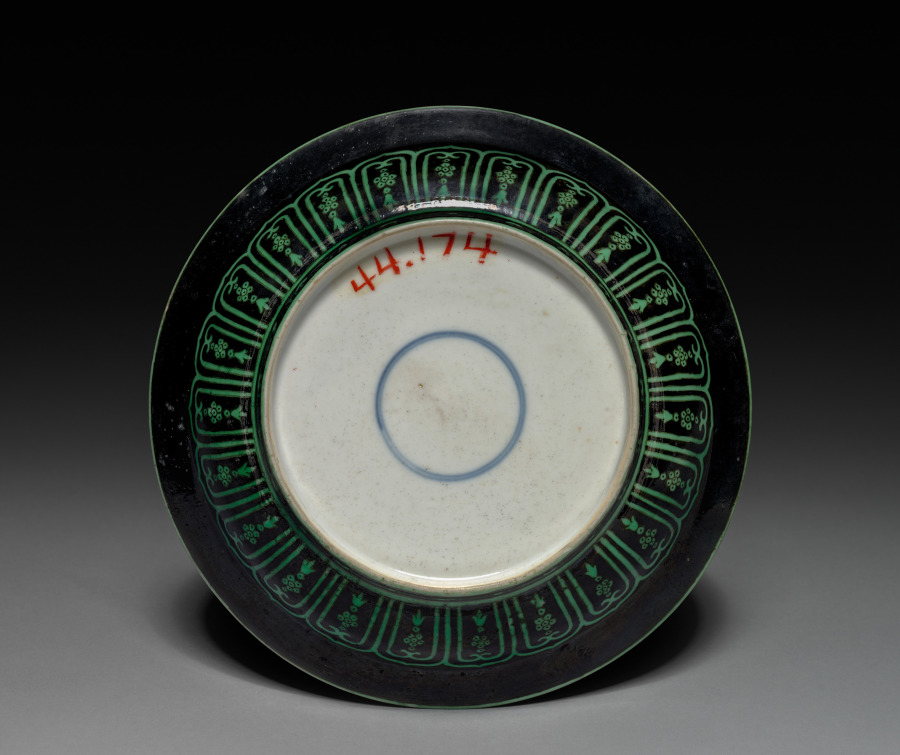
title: Dish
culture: China, Qing dynasty (1644–1911), Qianlong reign (1736–95)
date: 1736–95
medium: porcelain with famille rose overglaze enamel decoration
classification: Ceramic